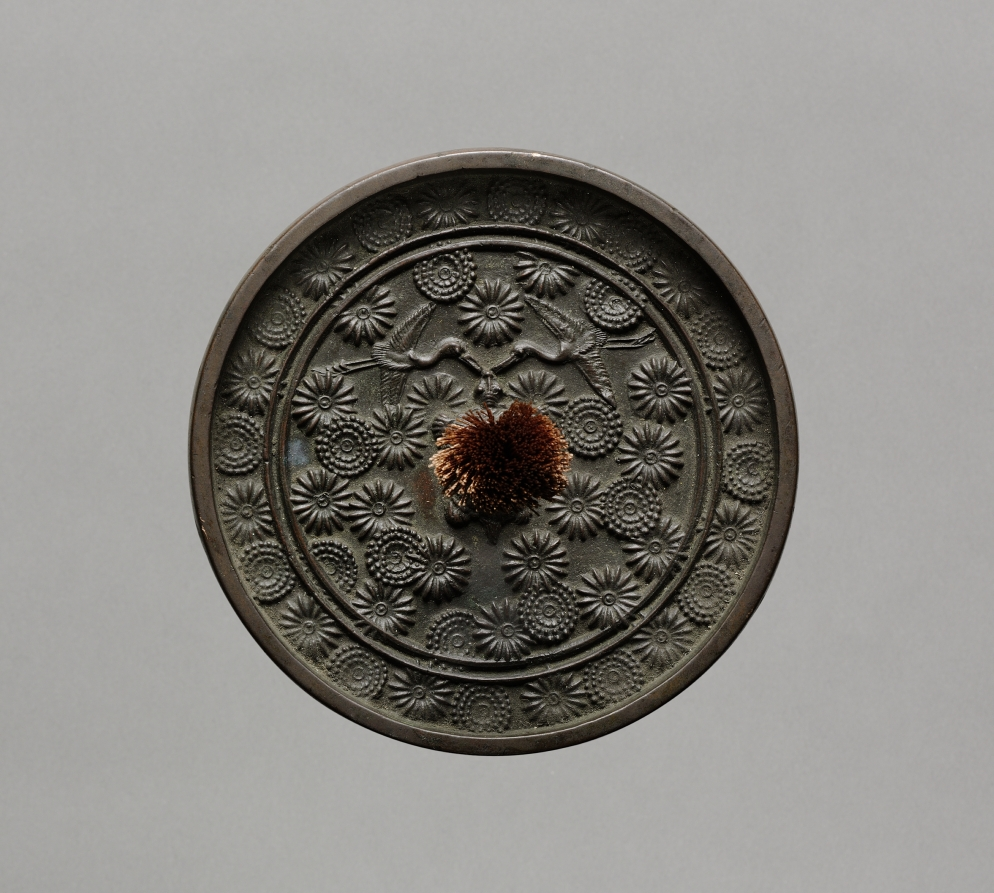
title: Mirror with Pair of Cranes in Chrysanthemum Pattern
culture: Japan, Muromachi period (1392–1573)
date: 1392–1573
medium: bronze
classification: Metalwork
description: The Japanese used chrysanthemums as decorative elements on mirrors. In the Heian period, a chrysanthemum with cranes or long-tailed birds was a common motif. Later, in the Kamakura and Muromachi periods, chrysanthemum designs were divided into three patterns with different symbolic associations: Chrysanthemum with Cranes represented longevity; Water Flowing suggested longevity as well as the Noh drama Kikujido, or Chrysanthemum Boy; and East Fence alluded to the poem "Drinking Wine" by Tao Yuanming (AD 365-427). Here, the mirror featuring Buddhist iconography (kyojo) and a chrysanthemum design on the back shows that the flower was also appreciated in the context of Buddhism in the Kamakura period.